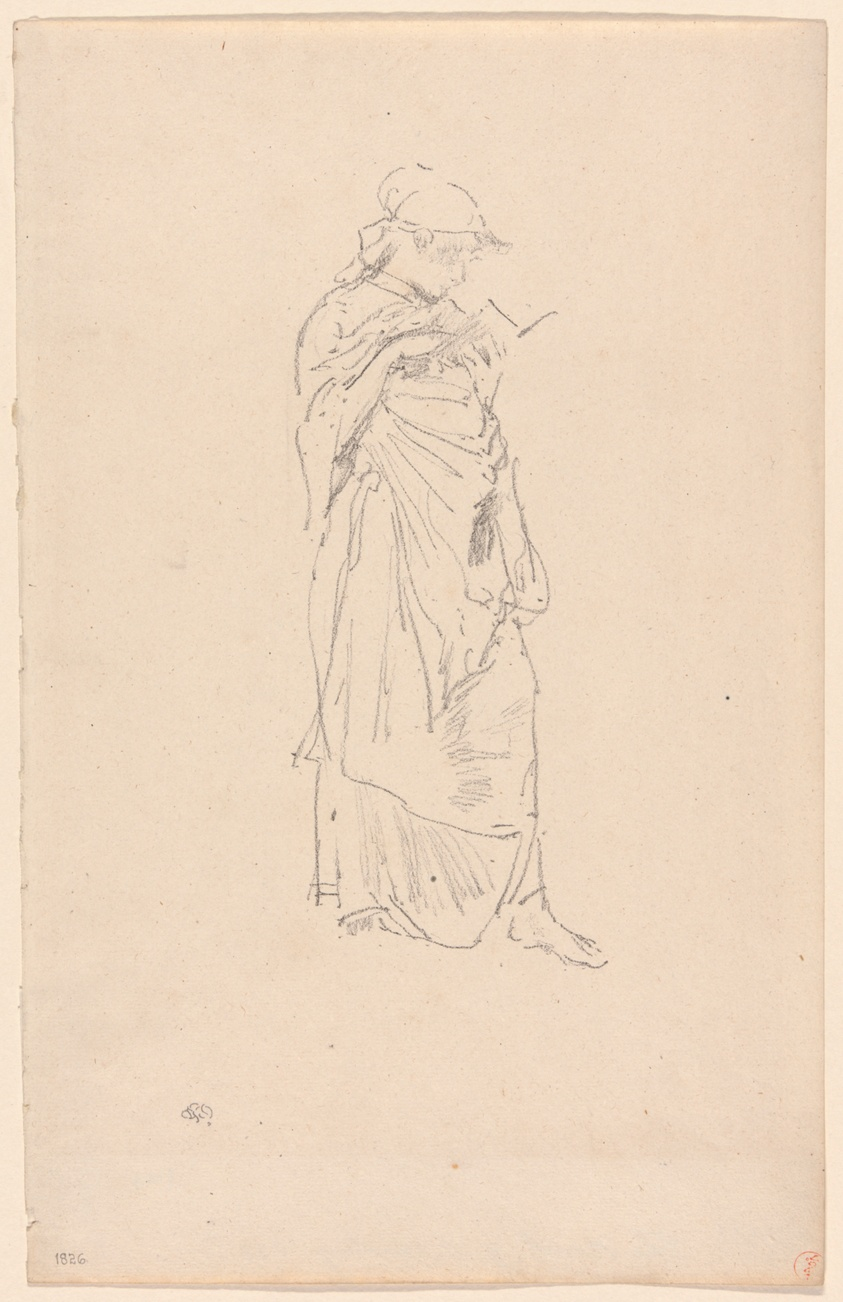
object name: Print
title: The Novel: Girl Reading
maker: James McNeill Whistler (American, 1834-1903)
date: probably 1889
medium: Transfer lithograph in black on cream laid paper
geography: United States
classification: transfer lithograph; lithograph; print; prints and drawing; paper